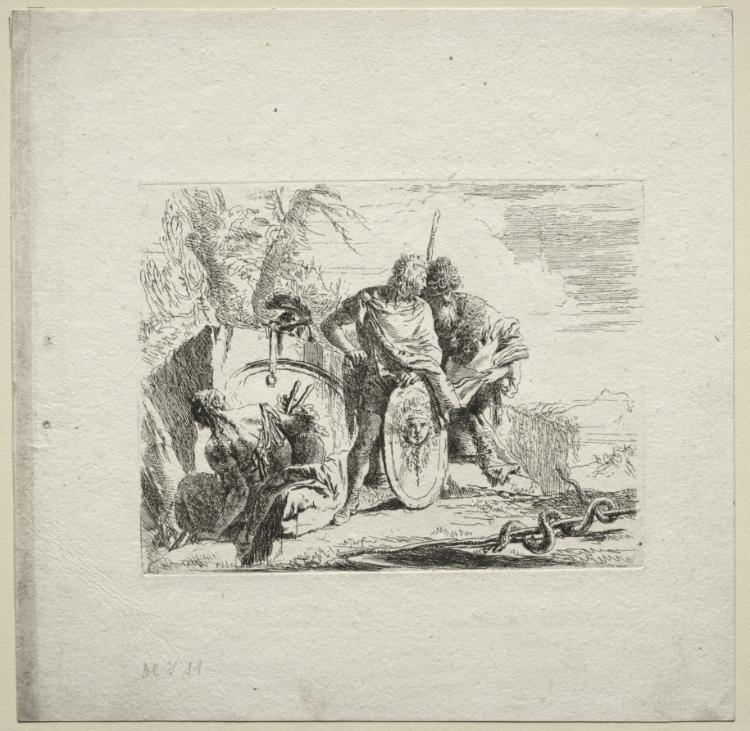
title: Various Caprices: The Young Soldier and the Astrologer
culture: Italy, 18th century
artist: Giovanni Battista Tiepolo (Italian, 1696–1770)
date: 1735–50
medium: etching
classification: Print